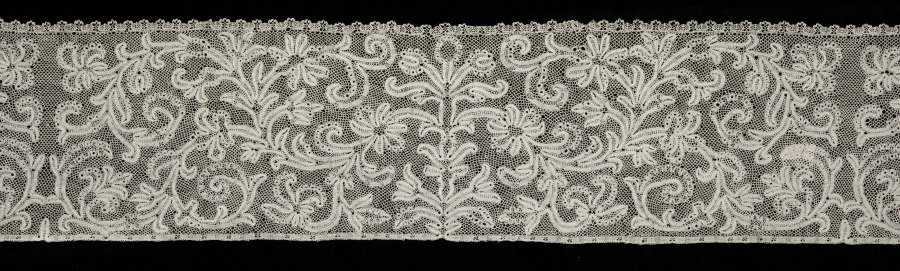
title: Lace Flounce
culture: Italy, Milan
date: 1700s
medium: Bobbin lace (Punto di Milano)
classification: Lace